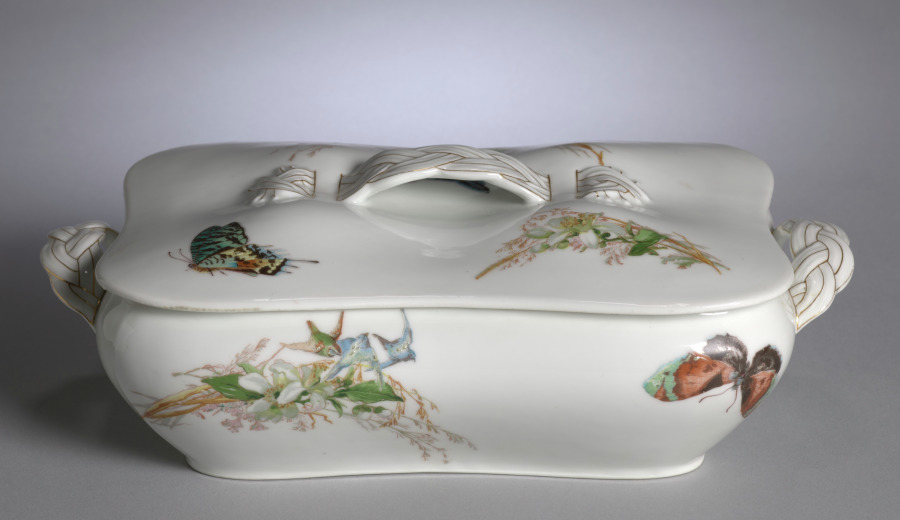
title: Covered Vegetable Bowl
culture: France, Limoges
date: c. 1890–1910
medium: porcelain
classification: Ceramic